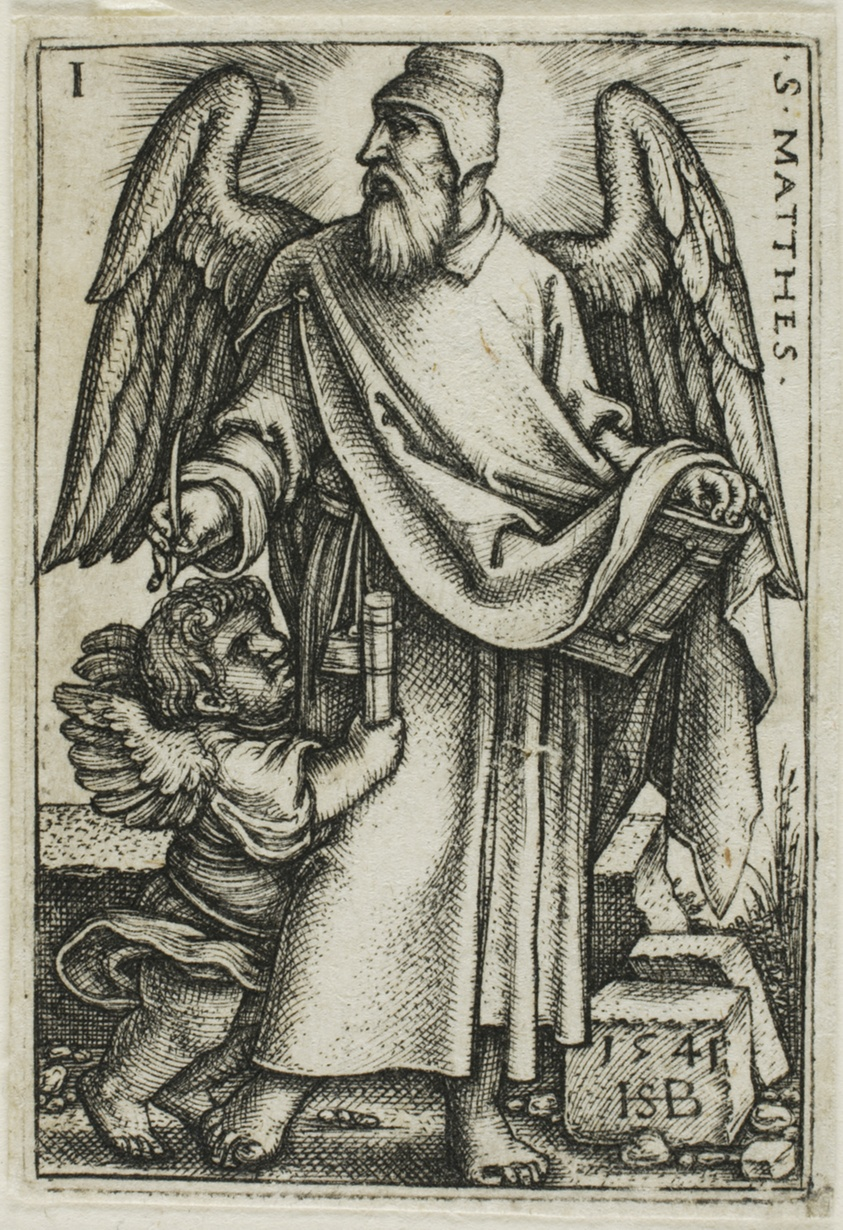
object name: Print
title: St. Matthew, from The Four Evangelists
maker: Sebald Beham; German, 1500-1550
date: 1541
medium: Engraving in black on ivory laid paper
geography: Germany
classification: engraving; print; prints and drawing